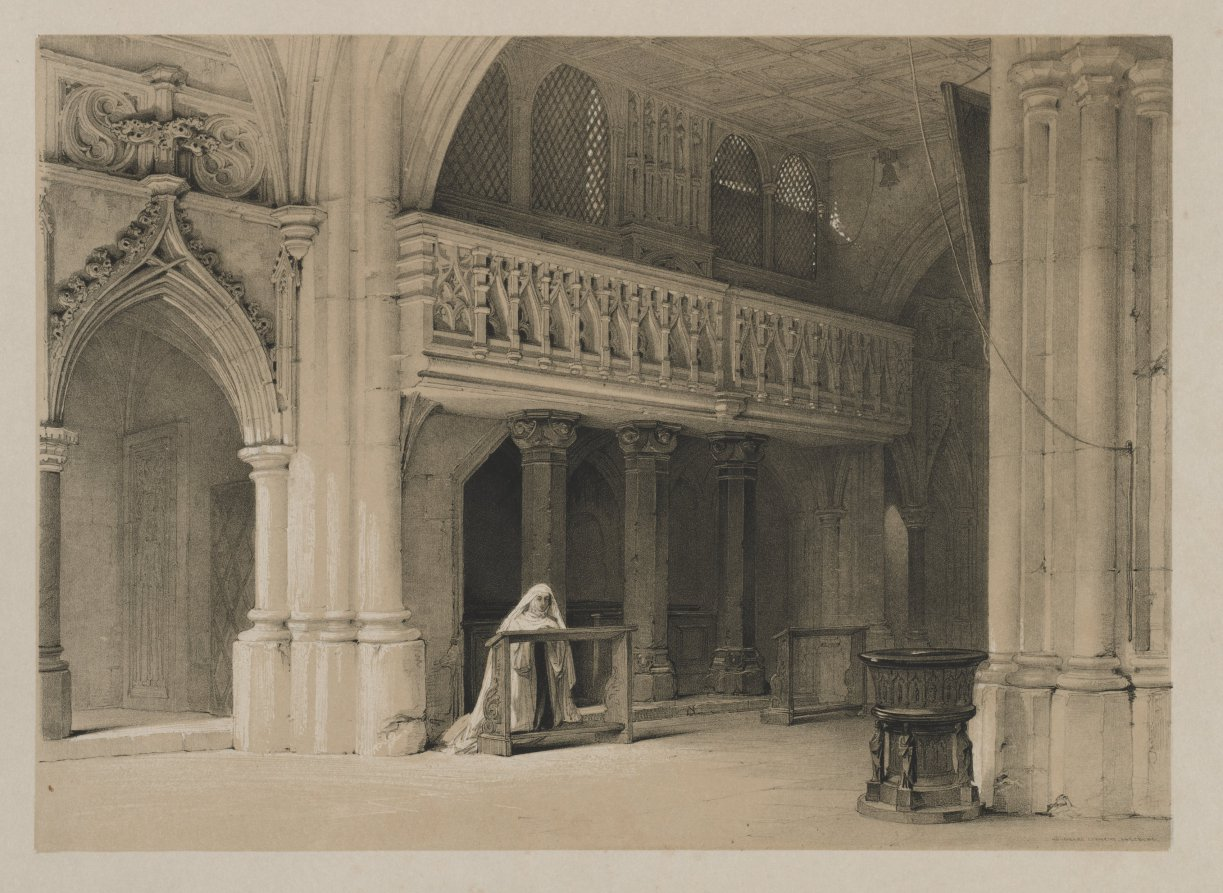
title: Sketches in Belgium and Germany, Volume I: Nönnberg Convent, Salzburg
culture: England, 19th century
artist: Louis Haghe (British, 1806–1885)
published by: Hodgson & Graves, 6 Pall Mall, London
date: 1840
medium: color lithograph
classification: Portfolio